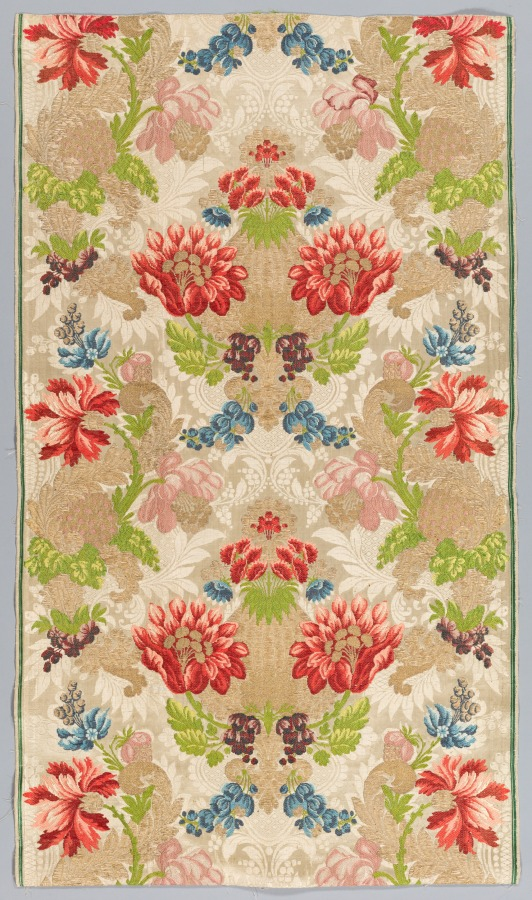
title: Length of Textile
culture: France or Italy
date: early 1700s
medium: brocade on satin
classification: Textile